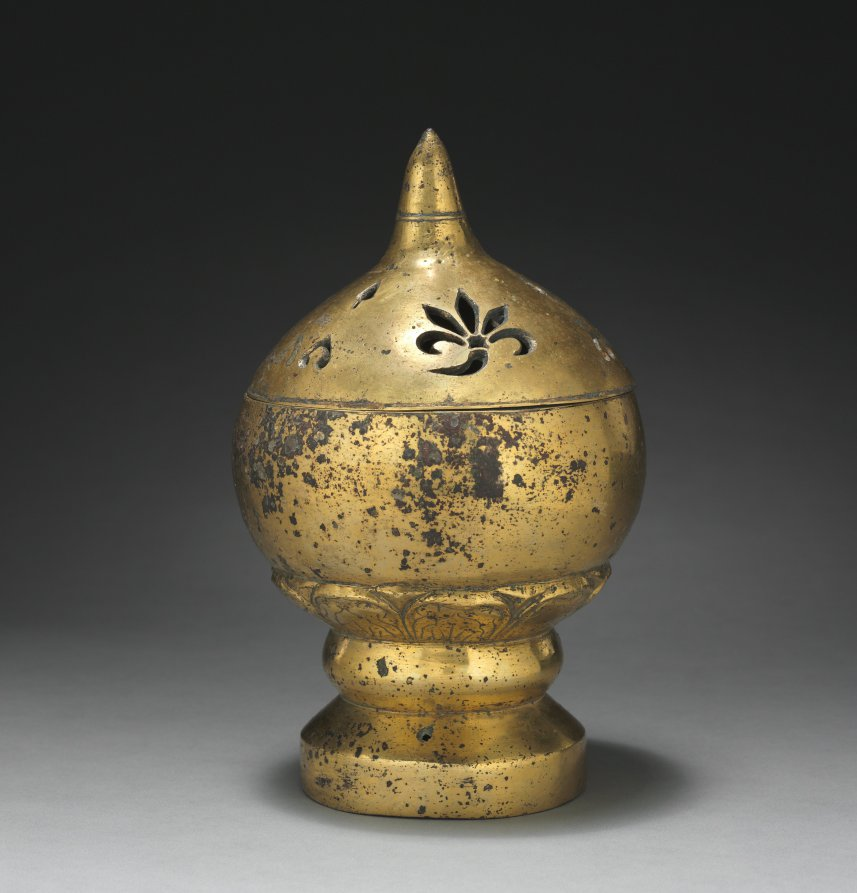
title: Censer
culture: China, Tang dynasty (618–907)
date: early 600s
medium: gilt bronze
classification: Metalwork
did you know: The censor's base has a band of incised lotus-petal motifs, while the pointed lid has openwork floral motifs to release the incense's aroma.